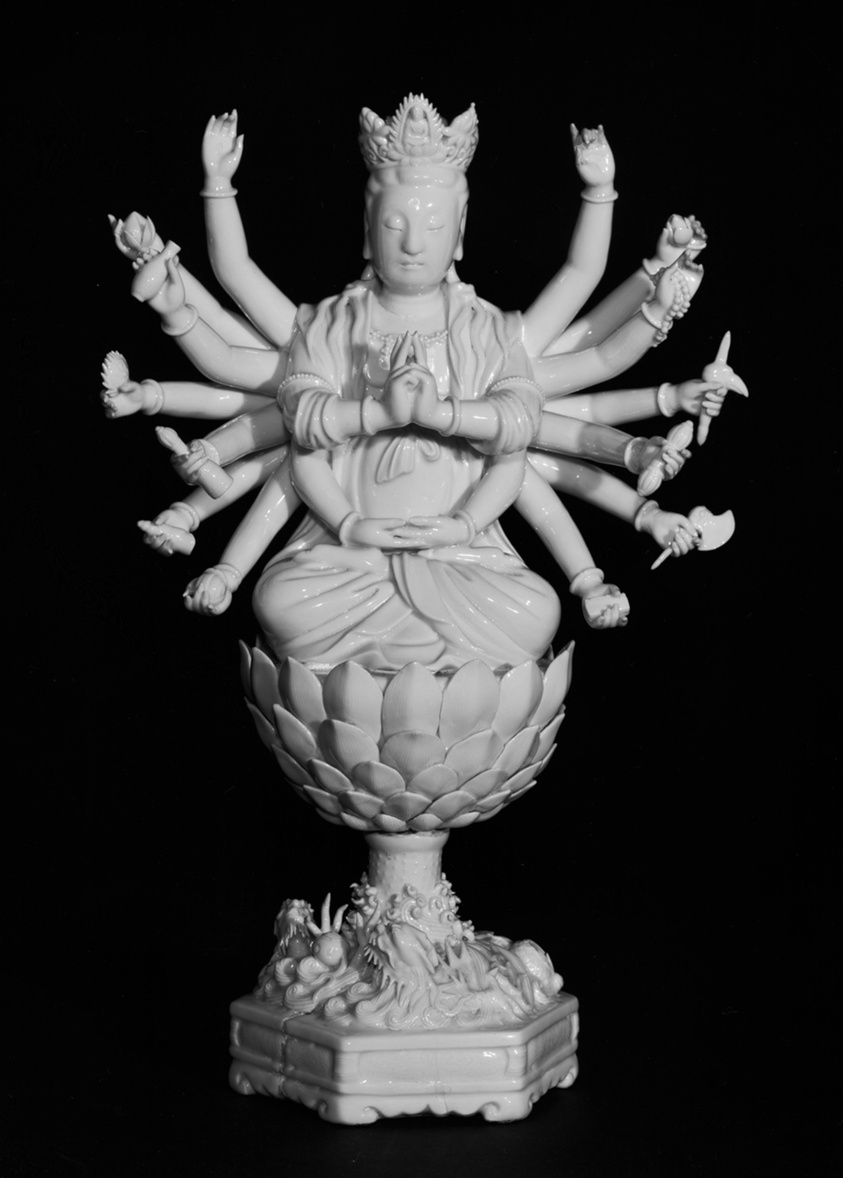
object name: Sculpture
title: Cundi Bodhisattva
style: Chinese (culture or style)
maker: China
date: Qing dynasty (1644–1911), 18th century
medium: Dehua ware (blanc de chine); porcelain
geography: China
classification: porcelain; asian art; ceramics; sculpture